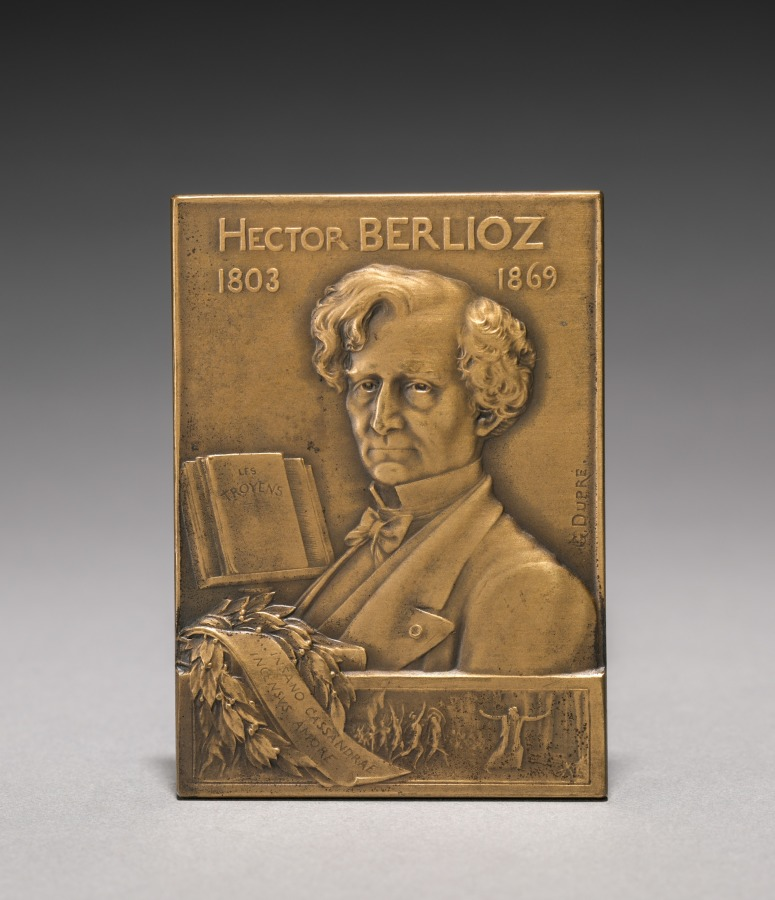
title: Medallion (obverse)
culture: France, early 20th century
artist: Jules Dupré (French, 1811–1889)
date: 1903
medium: bronze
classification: Metalwork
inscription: "Grenoble et la côte-saint-andré à Hector Berlioz"; signed: "G. Dupré."